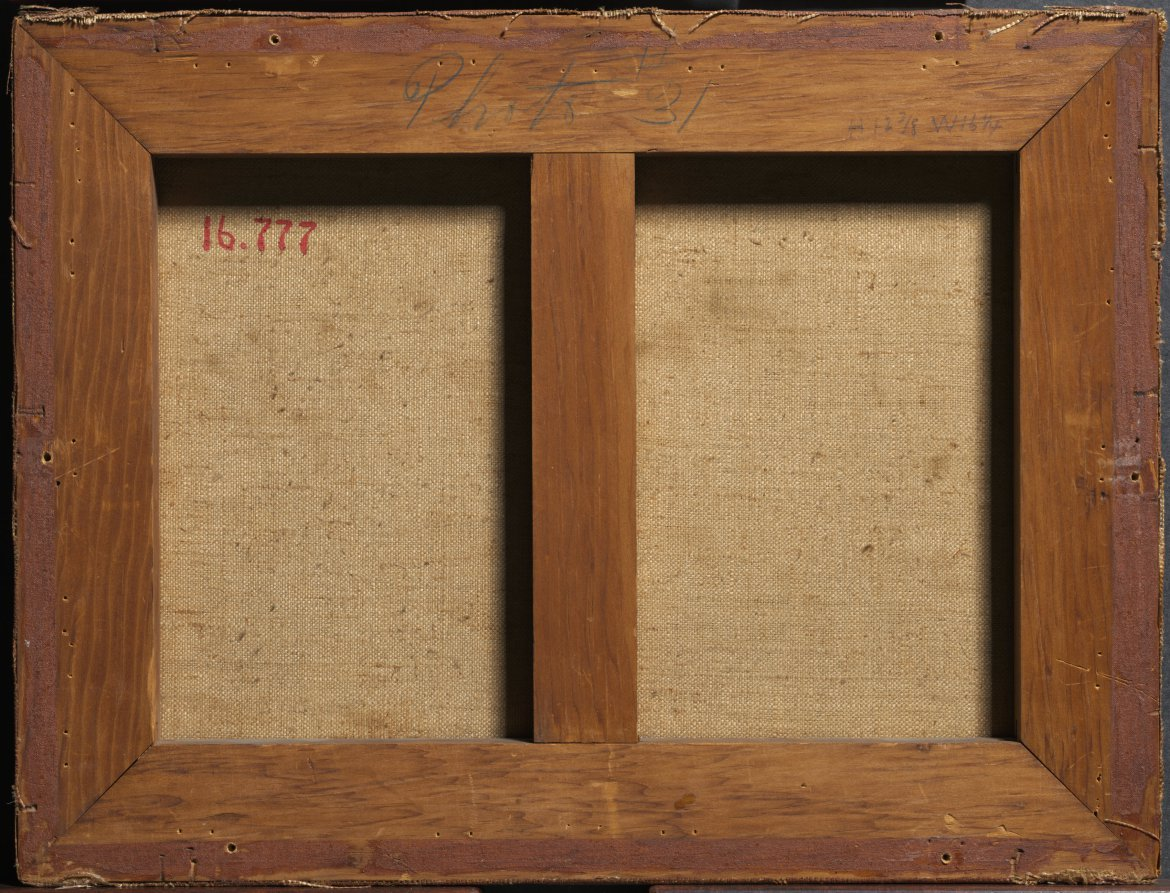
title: Old Woman Asleep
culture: possibly France, mid-19th Century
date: Mid 19th century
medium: oil on fabric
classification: Painting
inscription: Monogram on envelope at right edge of window sill: ard/f or rd/f